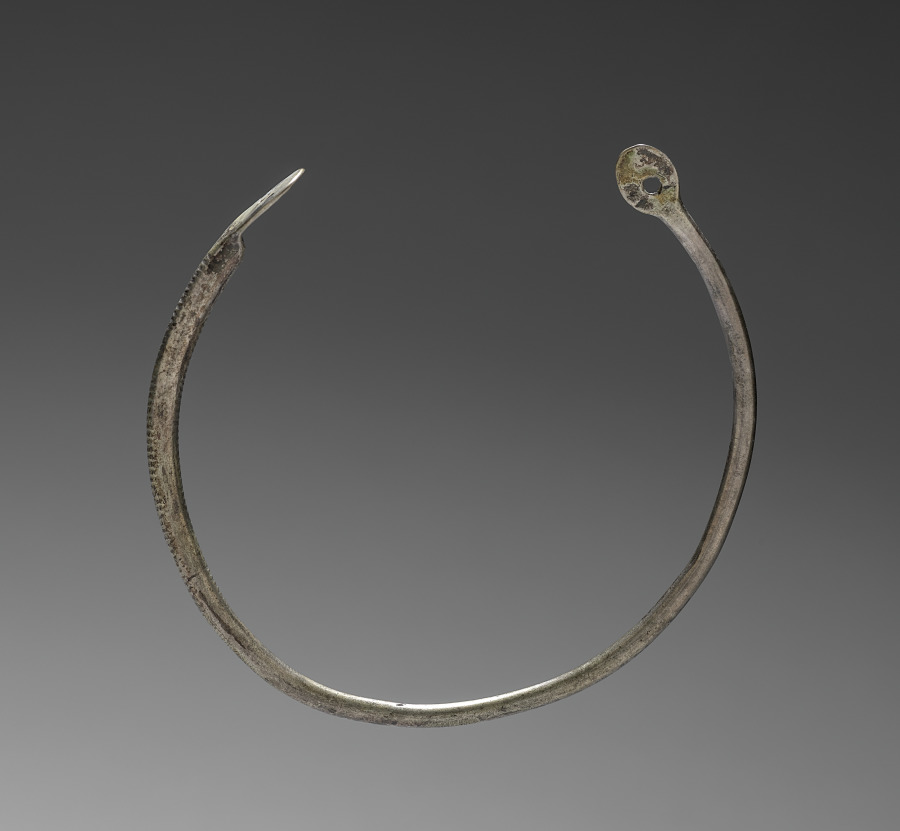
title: Nose Ring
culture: Indo-Chinese, made in France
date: 20th Century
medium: silver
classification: Jewelry